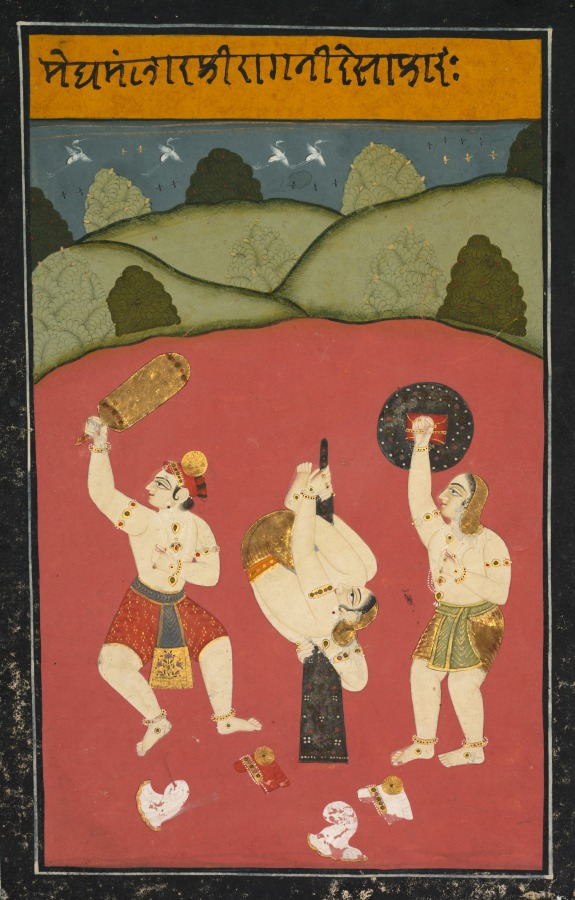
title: Ragini Desakh of Meghamalhar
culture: India, Rajasthan, possibly Raghugarh school, 18th century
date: c. 1770–90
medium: Gum tempera, ink, and gold on paper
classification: Painting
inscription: across top: Meghmallar's Ragini Desakhar